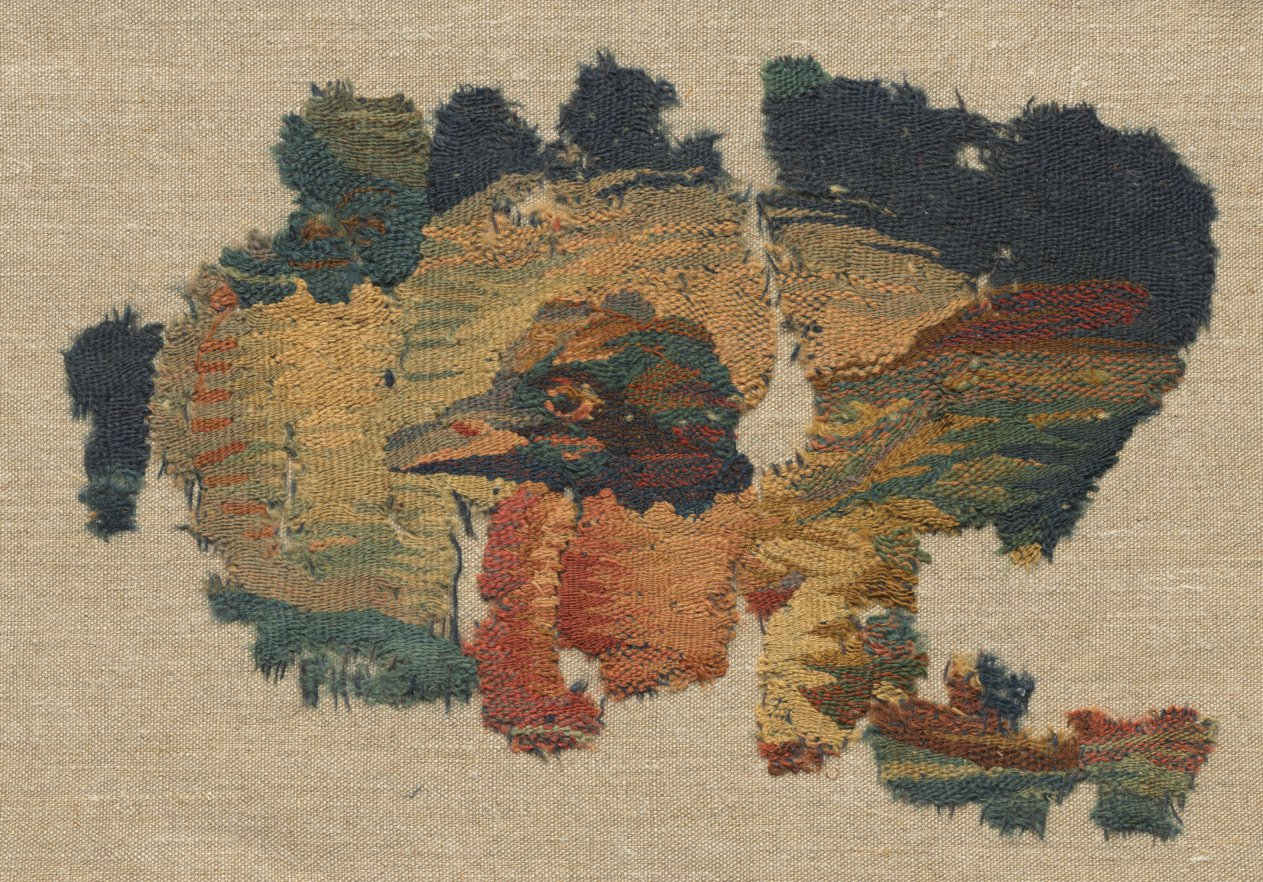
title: Duck's Head from a Large Curtain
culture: Egypt, Byzantine period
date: 200s CE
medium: tapestry weave: wool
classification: Textile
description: As creatures seen on Egypt's Nile River, ducks represent the abundance of life. The effects of shading and modeling are visible in the duck's head, which stands out against a background of sparkling water. The image is rendered in tapestry weave with wool dyed distinctive colors, several of which are combined, such as blue and red, and coral and blue-green on the right side, as if painted with dyed threads. While not common, scenes of aquatic life inspired by the Nile were celebrated in Coptic textiles. Typical of luxury curtains and hangings, the fragment is woven entirely with wool.